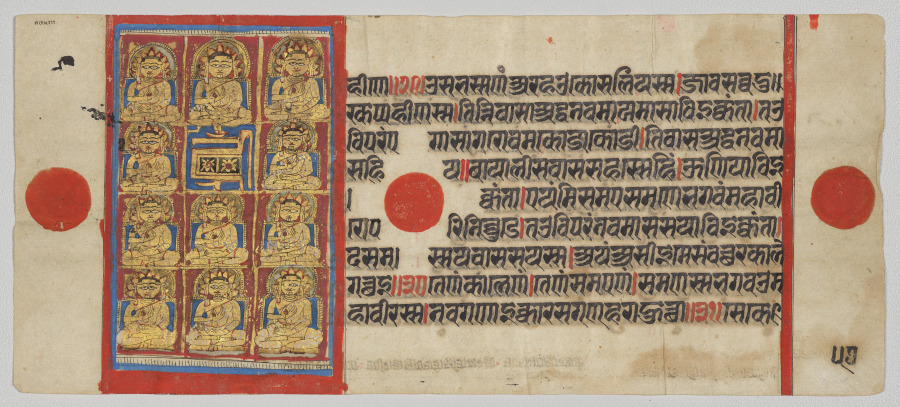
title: The Eleven Principal Disciples (Ganadharas) of Mahavira, Folio 57 (verso), from a Kalpa-sutra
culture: Western India, Gujarat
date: c. 1475–1500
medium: Gum tempera, ink, and gold on paper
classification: Painting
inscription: [[upper left]] gaṇadhara 11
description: The founder of Jainism, Mahavira, had 11 main disciples, all depicted as identical to one another. They all sit in a meditative posture, with the left hand in the lap, while the right hand is in the gesture of teaching. They each have shaven heads, elongated earlobes, and white robes, indicating that this manuscript was used by the Shvetambara (White Clad) sect. In the upper central grid, decorated with flowers, is a stylized om-hrim, mystic syllables visually combined to invoke the essence of all Jain teaching.